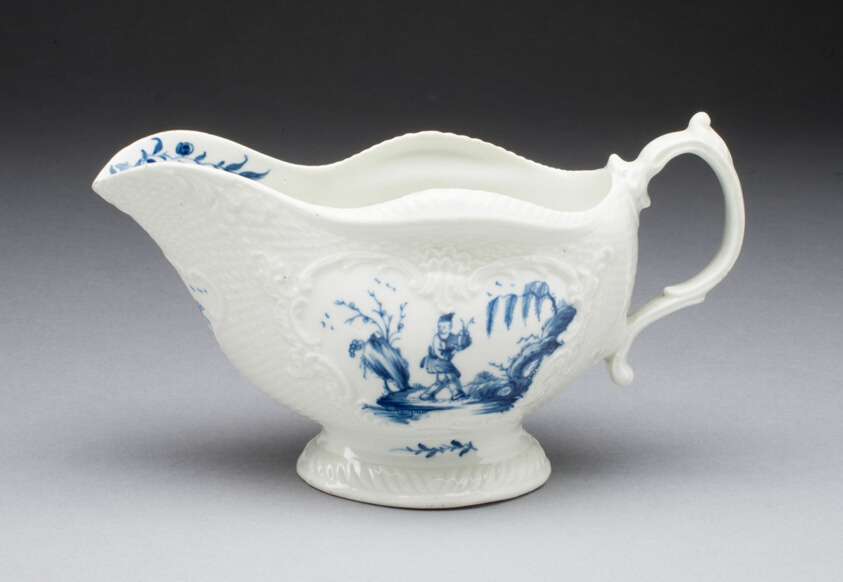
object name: Ceramics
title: Sauceboat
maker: Worcester Porcelain Factory (Warmstry House Period, 1751–1783); Worcester, England, founded 1751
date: c. 1765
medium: Soft-paste porcelain with underglaze blue decoration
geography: Worcester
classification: ceramics; tableware; porcelain; european decorative arts